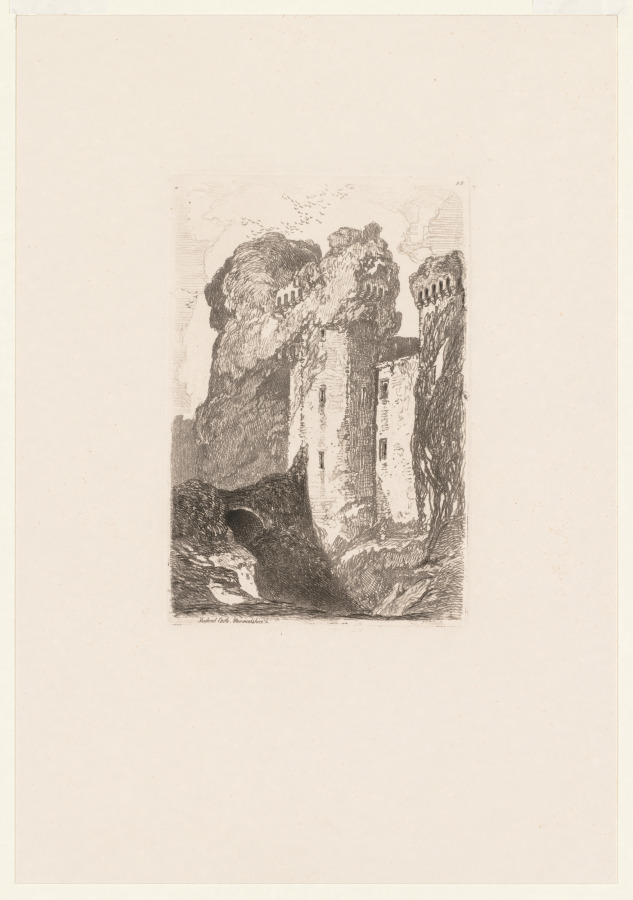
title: Liber Studiorium: Ragland Castle, Monmouhshire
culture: England, 19th century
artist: John Sell Cotman (British, 1782–1842)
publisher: H. G. Bohn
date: 1838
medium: softground etching and roulette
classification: Print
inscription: signed lower right in plate, J.S.Cotman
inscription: lower left of plate: Ragland Castle, Monmouhshire